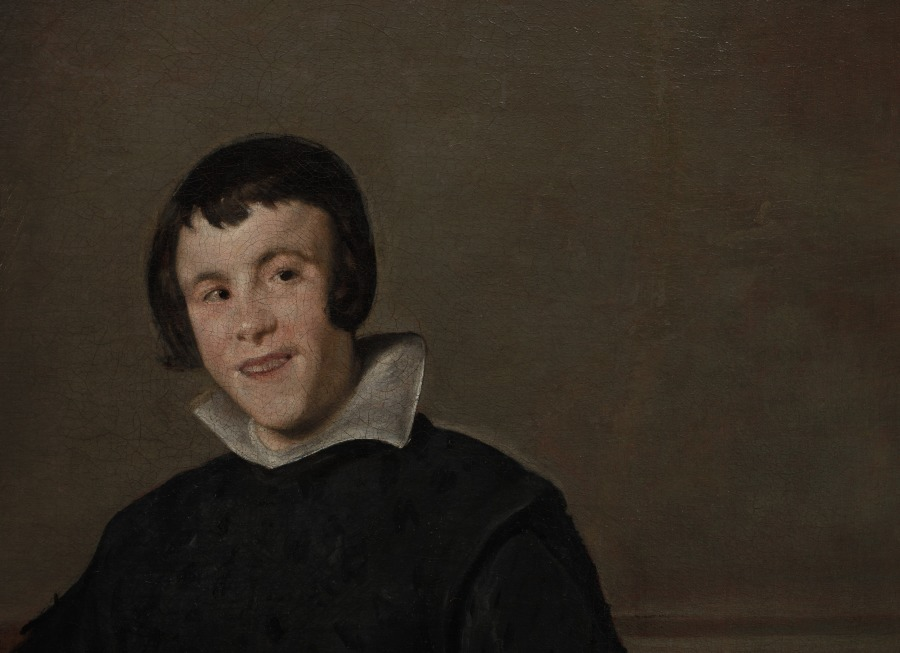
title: Portrait of the Jester Calabazas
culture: Spain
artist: Diego Velázquez (Spanish, 1599–1660)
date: c. 1631–32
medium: oil on canvas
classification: Painting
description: Calabazas, a jester in the court of King Philip IV of Spain, had physical and mental disabilities, a state that the artist emphasizes, rather than tries to hide. While the Spanish court prized and doted upon people with disabilities such as Calabazas, Velázquez transformed their depiction in portraiture. This startling work uses the format of the formal, full-length court portrait to present a type of person who was generally perceived as marginal at this point in history and profoundly humanizes him.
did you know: Calabazas holds a wind-driven pinwheel and a miniature portrait of a woman, together suggesting the inconstancy of love.